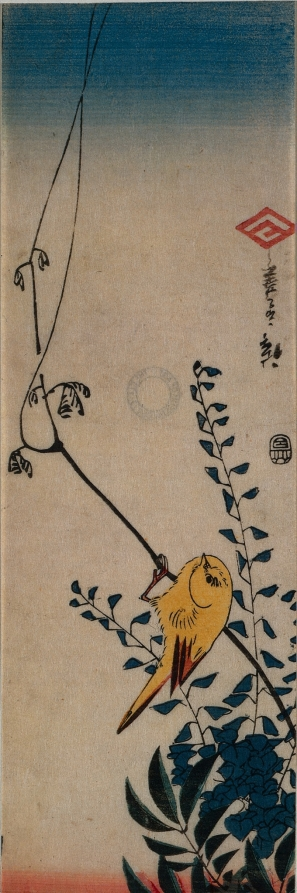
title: Canary and Wisteria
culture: Japan, Edo period (1615–1868)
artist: Utagawa Hiroshige (Japanese, 1797–1858)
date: mid-1840s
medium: color woodblock print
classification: Print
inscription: Signature: Hiroshige hitsu Artist Seal: Hiro Censorship Seal: Fukatsuya Ihei (Fu)